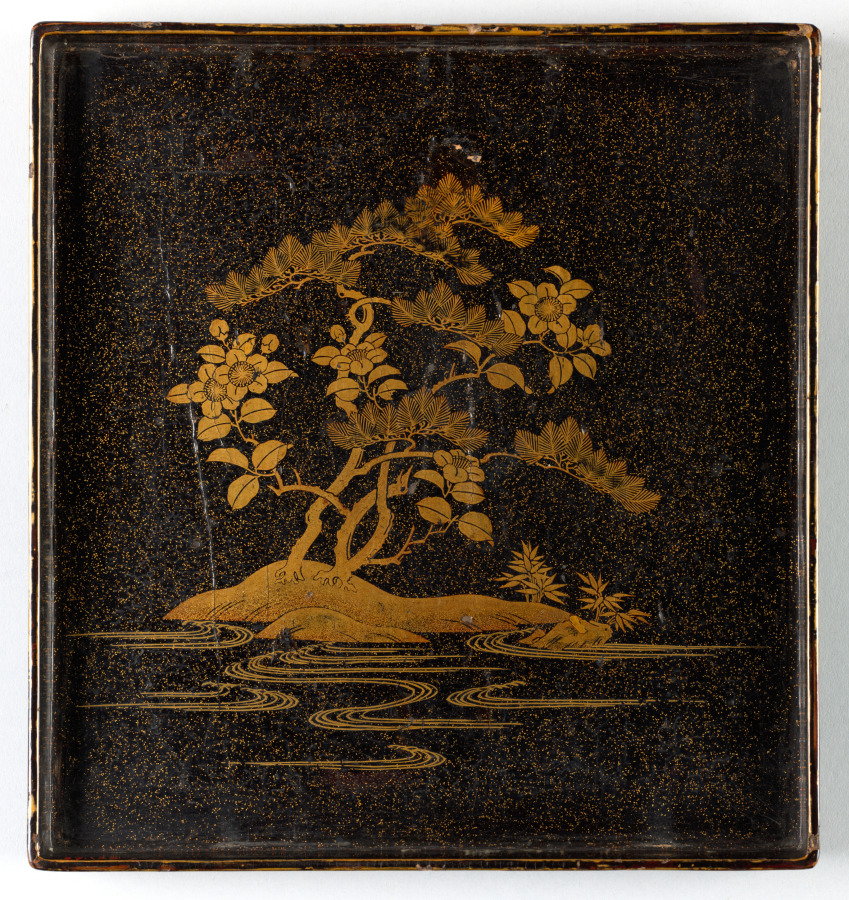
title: Writing Box (Suzuribako) with Pine, Camellia, and Bamboo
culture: Japan, Muromachi period (1392–1573)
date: 1400s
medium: Lacquered wood with gold and silver sprinkled powder (maki-e), stone, and metal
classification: Lacquer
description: Japanese writing boxes are designed to hold all the tools for traditional calligraphy, including an inkstone, water dropper, ink cake, and brushes. This box retains its inkstone and water dropper, the latter of which has a design of camellia and pine, matching the late winter, early spring lacquer motifs on the lid.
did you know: Pine, bamboo, and plum is a common seasonal motif; here the plum is replaced with camellia.